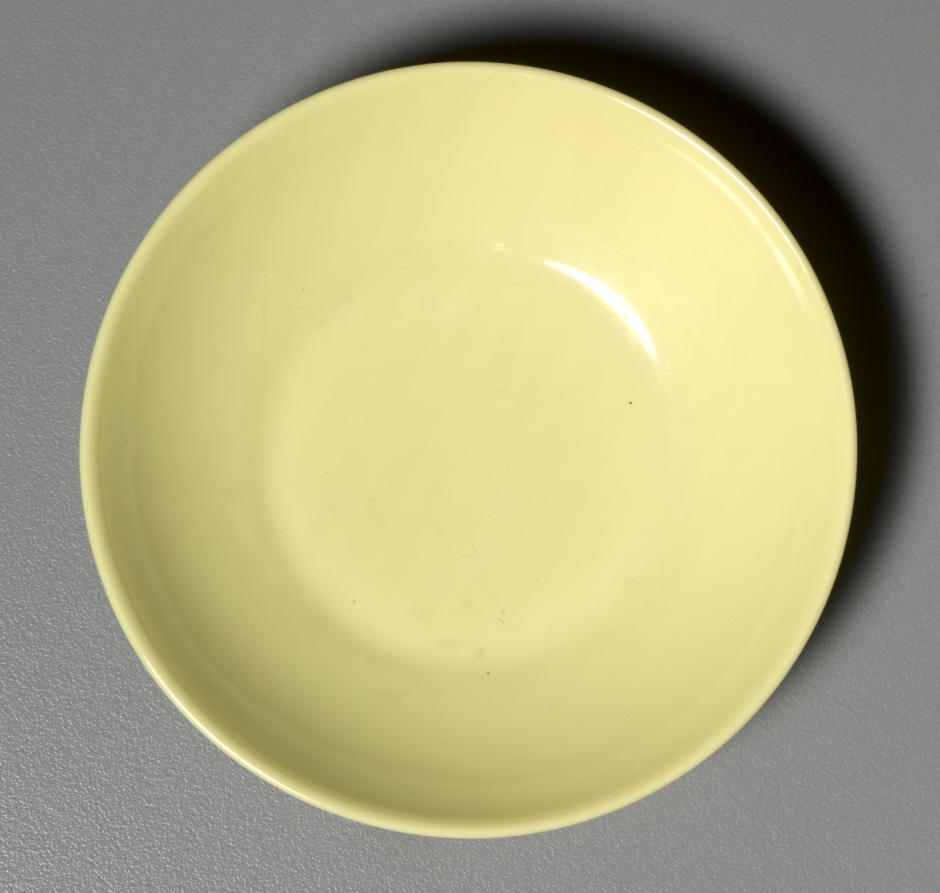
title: Small Dish with Yellow Monochrome Glaze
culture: China, Qing dynasty (1644-1911), Yongzheng mark and reign (1723-35)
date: 1723–35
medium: enameled porcelain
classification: Ceramic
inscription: 大清雍正年制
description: In the Qing dynasty (1644–1911), luxury items became more affordable to larger parts of the society, including women, merchants, and literati in non-official positions. Imperial patronage and a growing urban population encouraged consumption of luxury goods and local craftmanship. This enameled porcelain illustrates the the Qing dynasty accomplishments in porcelain techniques and the creative mind of the talented artisans who sought clients on a competitive market.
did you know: This monochromatic yellow dish was made for the imperial household.